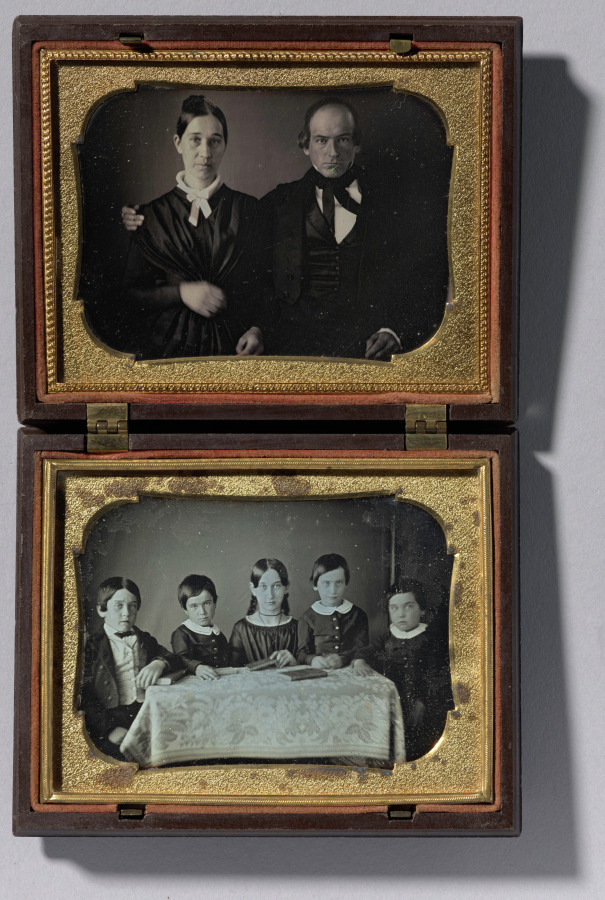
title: The Homework Table & Parents of Five Children Doing Homework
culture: America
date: c. 1858–60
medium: daguerreotype, quarter plate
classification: Photograph